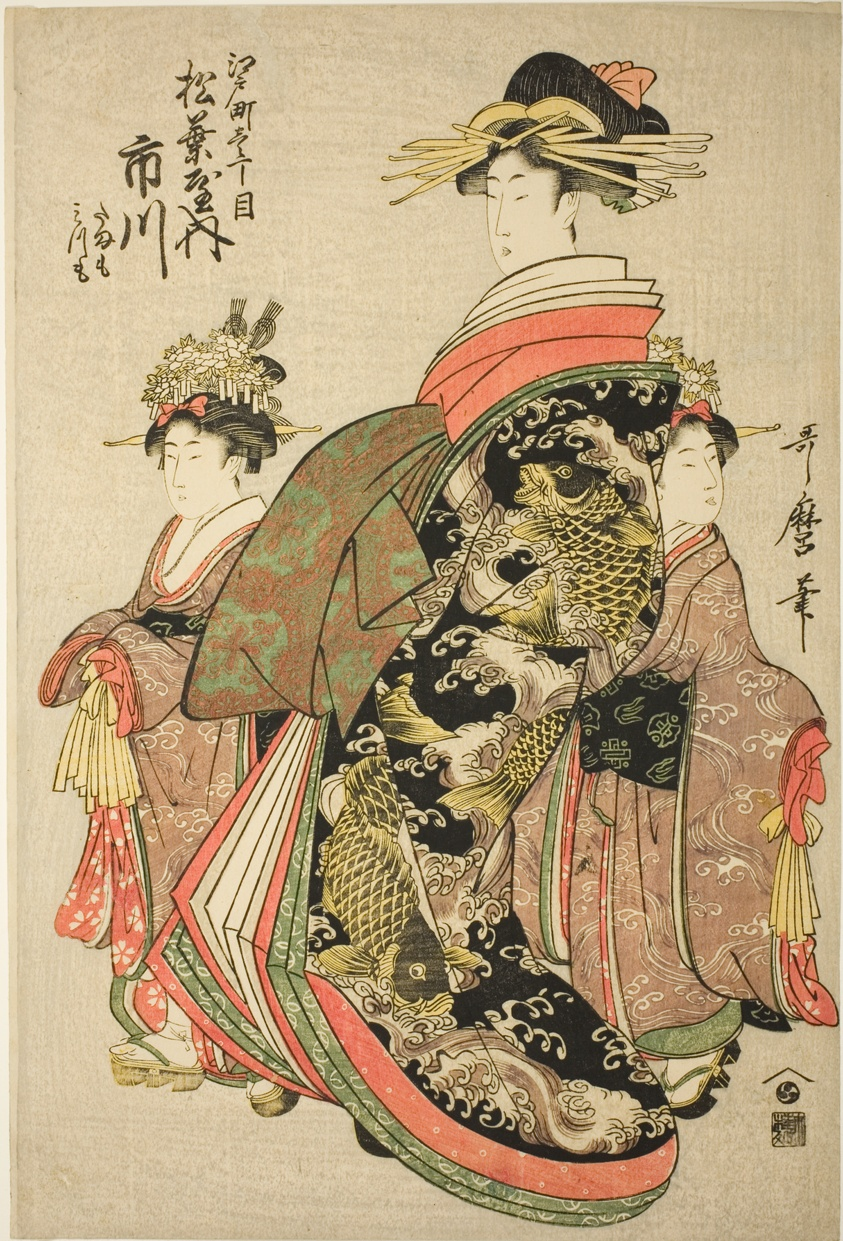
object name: Print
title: The Courtesan Ichikawa of the Matsubaya in Edo-machi Itchome, with her Child Attendants Tamamo and Mitsumo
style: Japanese (culture or style)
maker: Kitagawa Utamaro 喜多川 歌麿; Japanese, 1753 (?)-1806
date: c. 1803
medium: Color woodblock print; oban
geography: Japan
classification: woodblock print; print; asian art